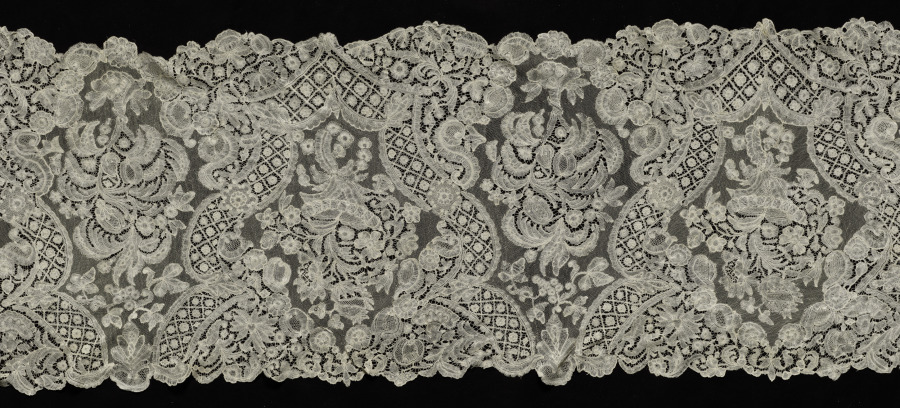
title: Lace Flounce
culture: Belgium, Brabant(?)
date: 1740–60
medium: Linen: bobbin lace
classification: Lace